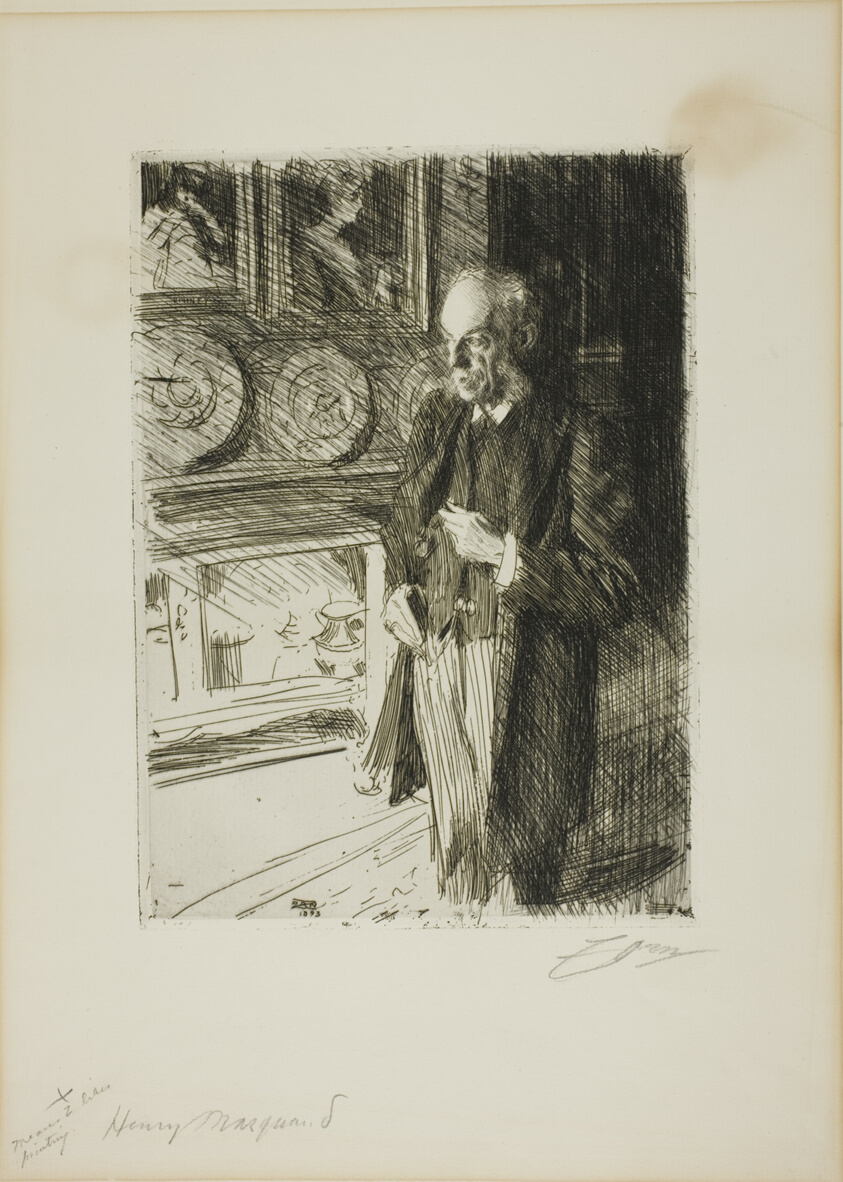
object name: Print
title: Henry Marquand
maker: Anders Zorn (Swedish, 1860-1920)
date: 1893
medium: Etching on ivory laid paper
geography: Sweden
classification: etching; print; prints and drawing